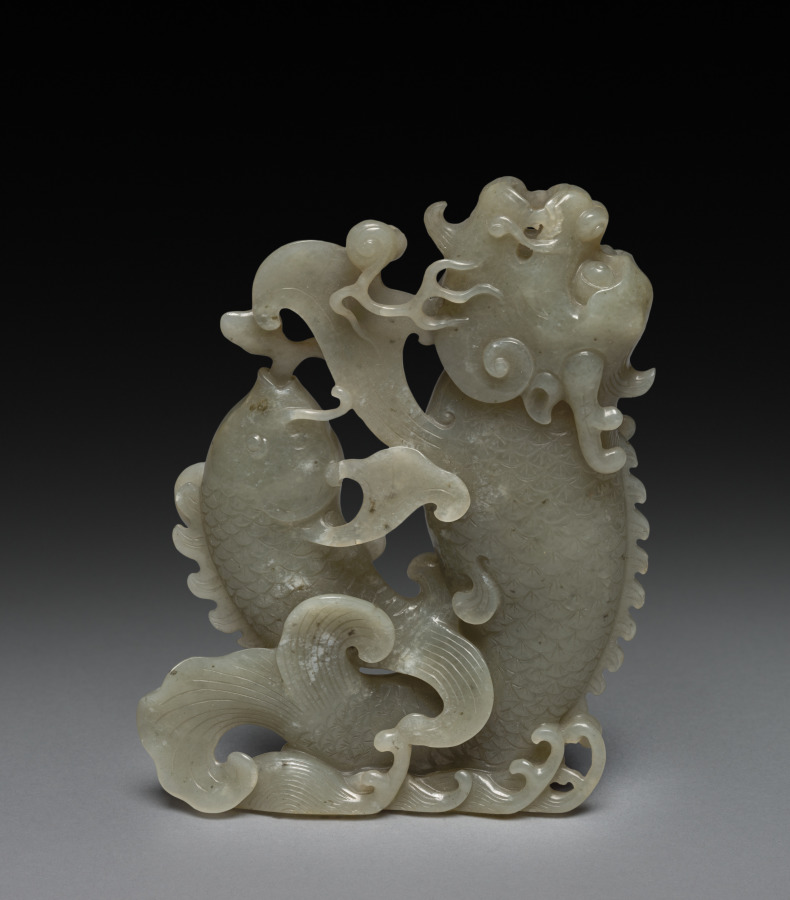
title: Leaping Carp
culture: China, Qing dynasty (1644-1911)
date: 1700s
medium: jade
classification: Jade